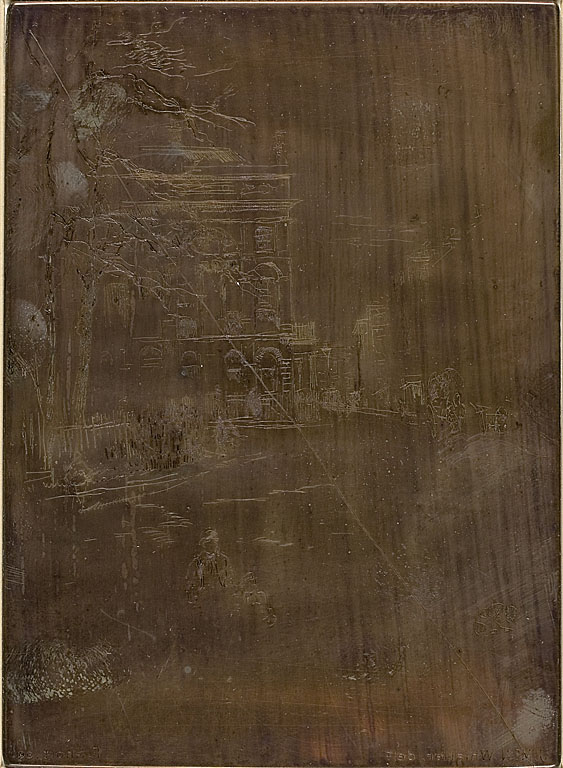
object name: Print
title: Fitzroy Square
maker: James McNeill Whistler (American, 1834-1903)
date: 1878/1881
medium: Cancelled copper etching plate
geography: United States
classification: copper plate; etched plate; matrix; prints and drawing; print